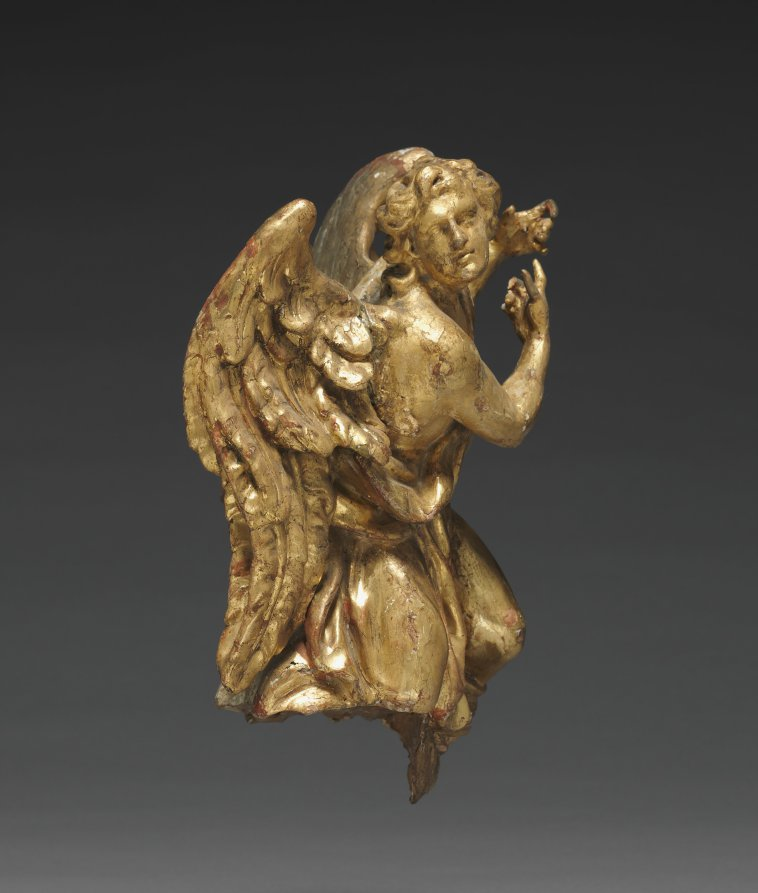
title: Altarpiece with Relics - Angel, lower right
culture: Germany, Bavaria, 18th century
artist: Joseph Matthias Götz (German, 1696–1760)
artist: and Workshop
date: c. 1735–1740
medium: gilded wood, with relics in niches: gilded wood, mother-of-pearl, ebony, red silk, gold wire, seed pearls, rock crystal, pen and ink on paper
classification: Sculpture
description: Götz covers every surface in gold leaf, giving each part of the object equal importance, rather than simply framing a central picture. In this distinctively Central European approach, figural narrative is subordinate to the overall ensemble. Götz designed this object to rest on top of an altar, probably in front of a larger painted or sculpted decorative scheme. The work contains relics seen through the small windows on the perimeter. These small remains of holy figures demonstrate the persistence of a medieval Catholic tradition well into the 1700s.